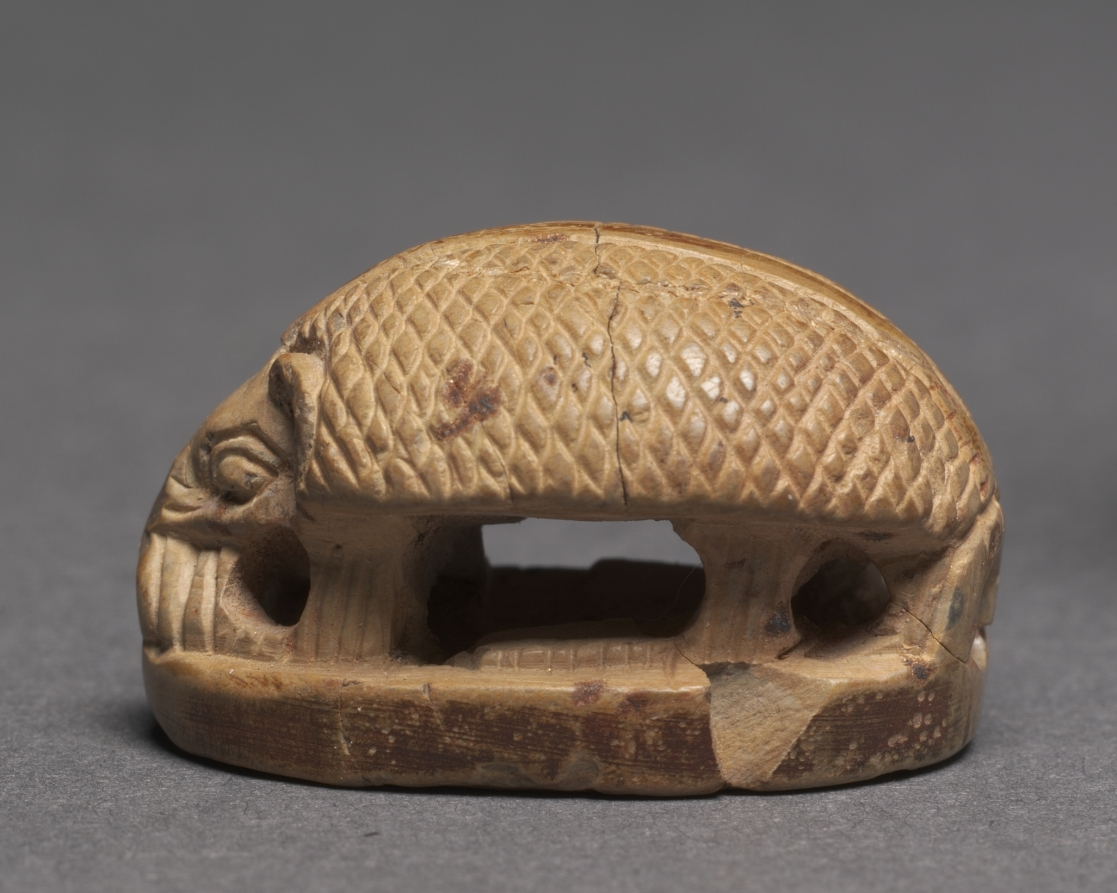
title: Hedgehog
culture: Egypt, New Kingdom (1540–1069 BCE), Dynasty 18, reign of Amenhotep III (1390–1352 BCE)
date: c. 1391–1353 BCE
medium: steatite, originally glazed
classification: Scarabs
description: This hedgehog (Paraechinus aethiopicus) stands in the round on an oval base, with openwork defining the legs. The carving is delicate and spirited. The face features large, round eyes; widely spaced, short ears; bulging cheeks; and a protruding snout. A tiny tail hangs at the rear. Crosshatching on the back represents the animal's spines. The design on the base begins at the head with a winged sun disk with pendant uraei. Below is a cluster of hieroglyphic signs, including an ankh-sign, a falcon with a sun disk, a hoe, and a maat-feather. A neb-sign fills the balance below. The significance of the hedgehog has multiple theories. As a hibernating animal, it may have associated with the powers of self-renewal and resurrection. Another lies in the animal's defensive strategy of inflating itself into a ball and projecting its spines, a posture of obvious apotropaic significance. Lastly, Egyptian folklore maintained that hedgehog amulets provided protection against snake bites, a belief grounded in the animal's natural resistance to poison.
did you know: Hedgehogs were common on amulets in the New Kingdom (1500s–1000s BC) and can also be seen on the backs of seals and scaraboids.